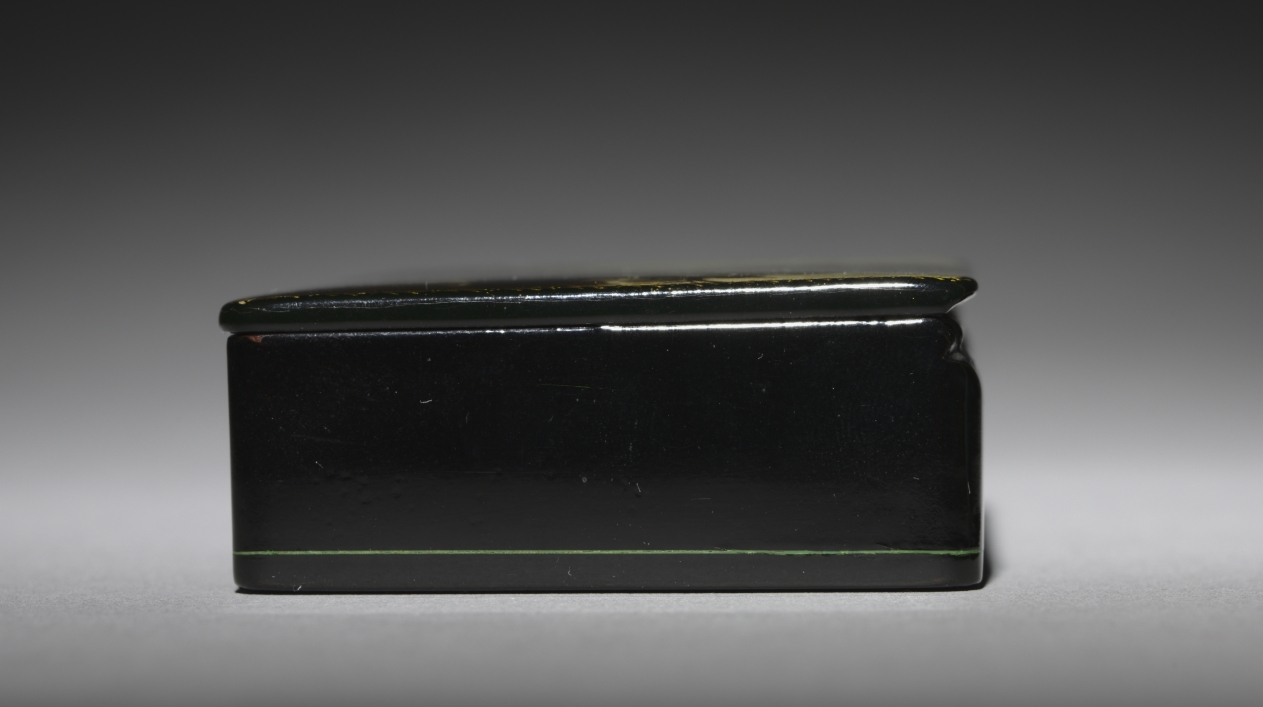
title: Snuff Box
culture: Russia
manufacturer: Lukutin Factory (Russian, 1818–1904)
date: 1800s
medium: wood with black lacquer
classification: Miscellaneous